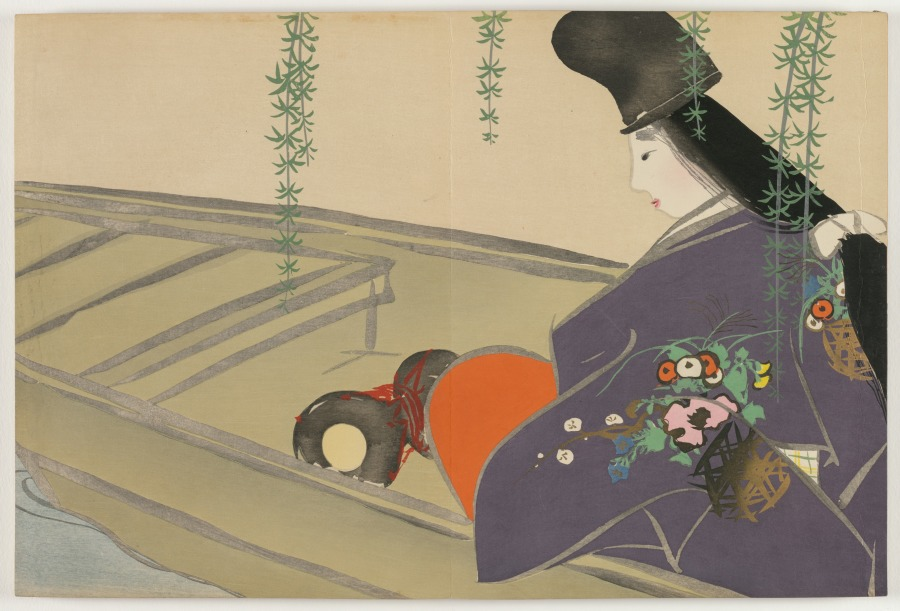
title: Flowers of a Hundred Worlds (Momoyogusa): Asazuma in Her Boat (Asazuma-bune)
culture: Japan, Meiji period (1868–1912)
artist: Kamisaka Sekka (Japanese, 1866–1942)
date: 1909–10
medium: color woodcuts with gold and silver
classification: Bound Volume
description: This print from a set of three woodblock printed albums displays the graphic design prowess of Kamisaka Sekka. The images were first distributed one by one to subscribers to the series but later were reissued in bound form, like this book, for mass consumers. Each print features a vignette taken from nature or Japanese literature. Many of the scenes have a long history in Japan, originating in the 900s or 1000s and having been interpreted by all manner of artists since that time. Sekka’s selections hew closely to precedents from the Rinpa style originated by painter Tawaraya Sōtatsu (c. 1570–c. 1640) and calligrapher Hon’ami Kōetsu (1558–1637).